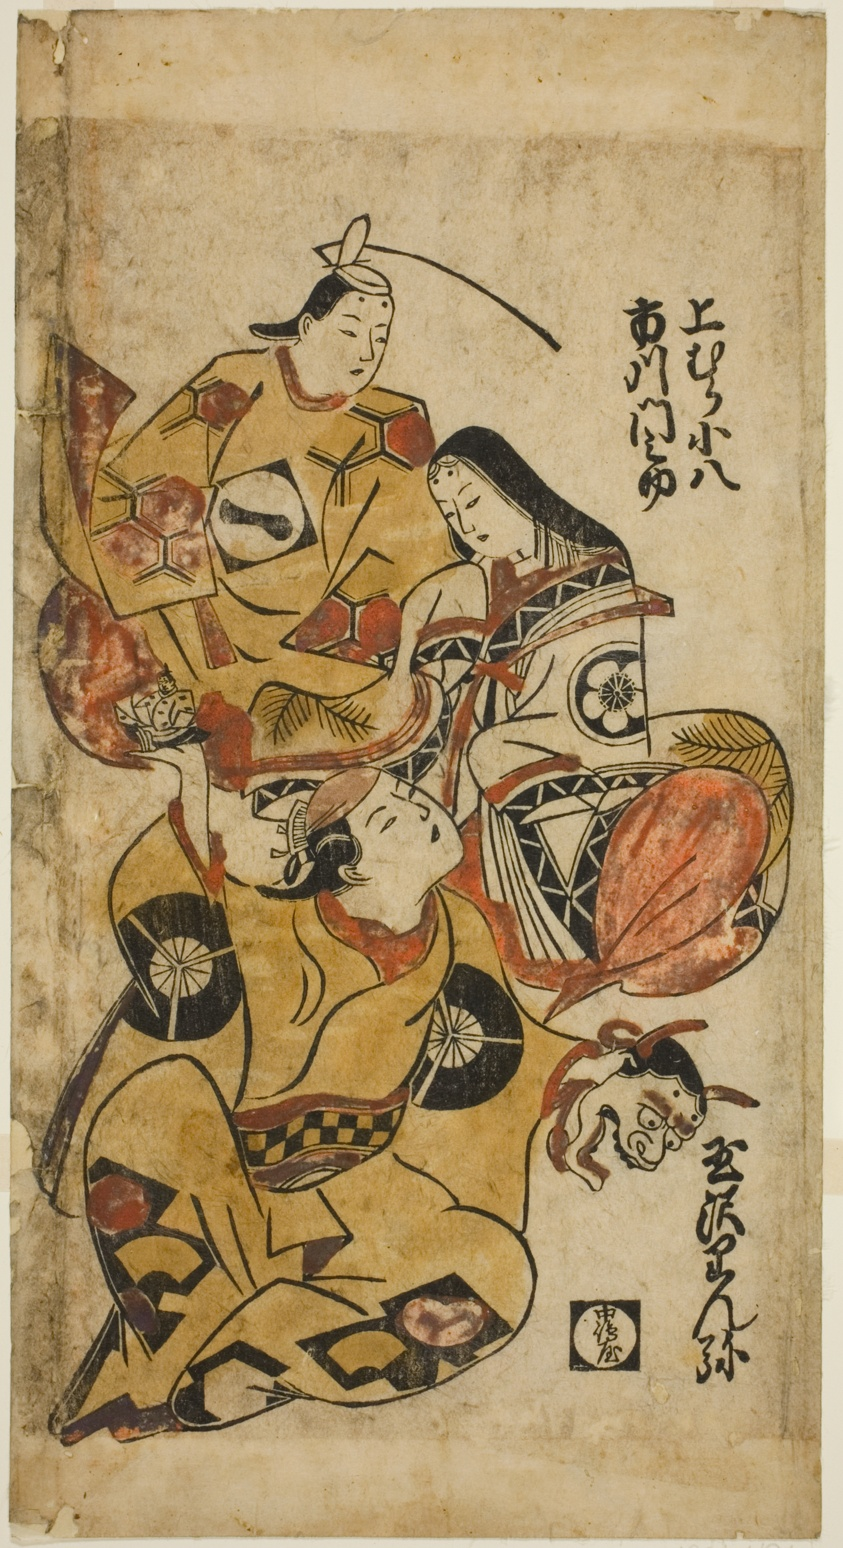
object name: Print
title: The Actors Tamazawa Rinya, Uemura Kohachi, and Ichikawa Monnosuke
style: Japanese (culture or style)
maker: Attributed to Torii Kiyonobu I; Japanese, 1664-1729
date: c. 1715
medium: Hand-colored woodblock print; hosoban, tan-e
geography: Japan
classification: woodblock print; print; asian art